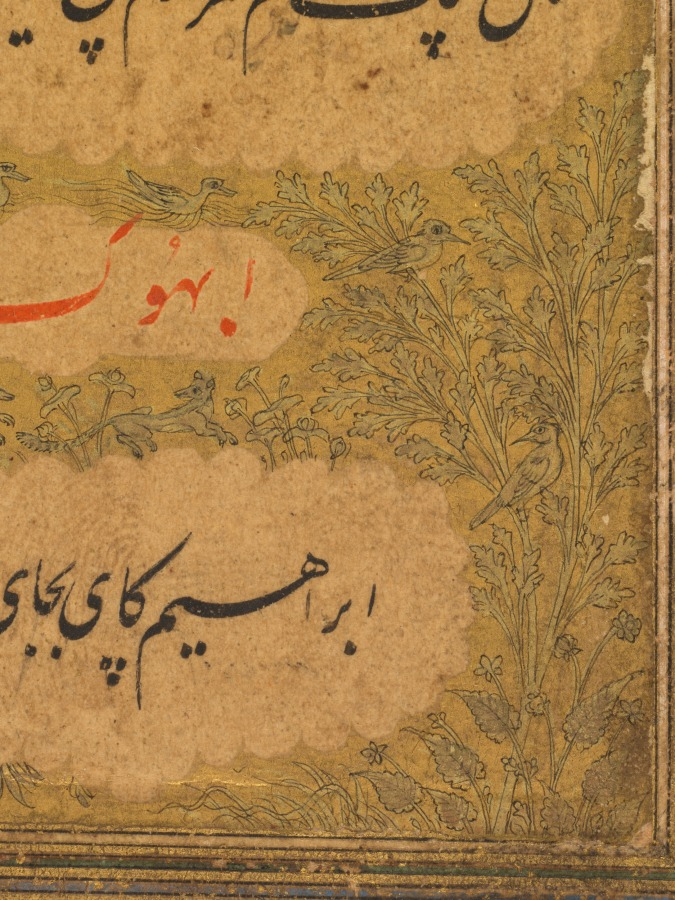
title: From Dohras (Songs) 40 and 42 from the Kitab-i Nauras (Book of Nine Essences) of Sultan Ibrahim Adil Shah II of Bijapur (r. 1580–1627) (recto)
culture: India, Bijapur, Deccan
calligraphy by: Khalilullah Butshikan (Persian, active in India 1596–c. 1620)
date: 1618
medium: ink with two-tone gold on paper, double-sided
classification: Painting